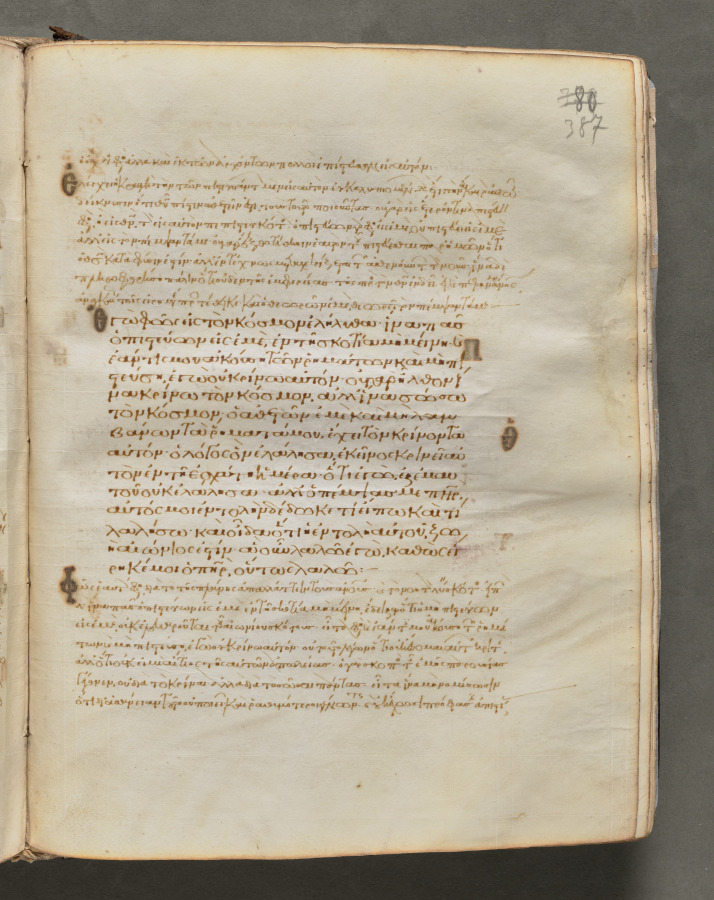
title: Text, folio 387 (recto), from a Gospel Book with Commentaries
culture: Byzantium, Constantinople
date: c. 1000–1100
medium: ink, tempera, and gold on vellum; leather binding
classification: Bound Volume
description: Each of the four gospels in this book opens on a page with brilliantly illuminated borders depicting the author of the text as well as birds—principally peacocks, symbols of the immortality of the soul—and fountains, representing the fountain of life and the salvation of the soul. This volume consists of 428 leaves with texts in Greek. Its level of sophistication suggests that it was probably written and decorated in a monastery in Constantinople.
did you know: Gospel books were carried in procession through Byzantine churches.